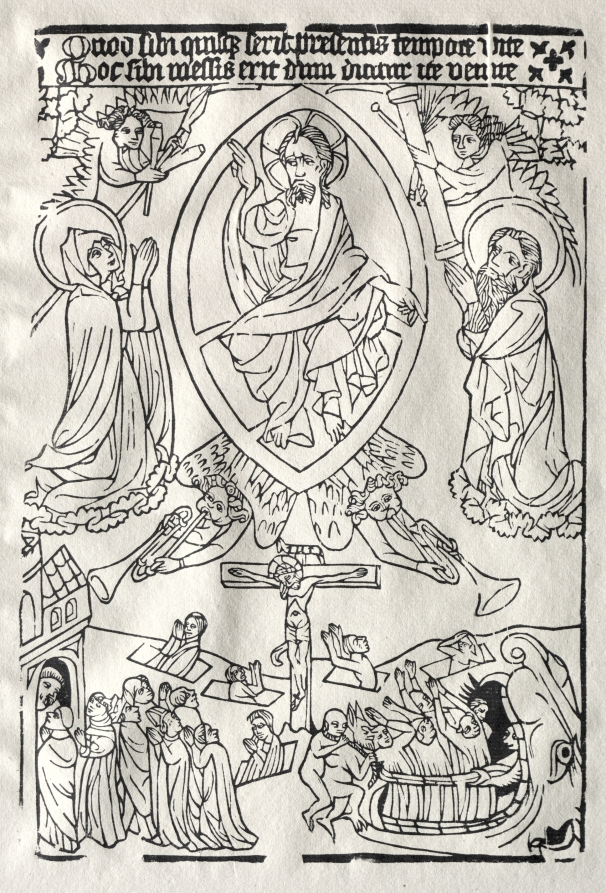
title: Das Jüngste Gericht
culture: Germany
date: c. 1430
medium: woodcut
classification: Print